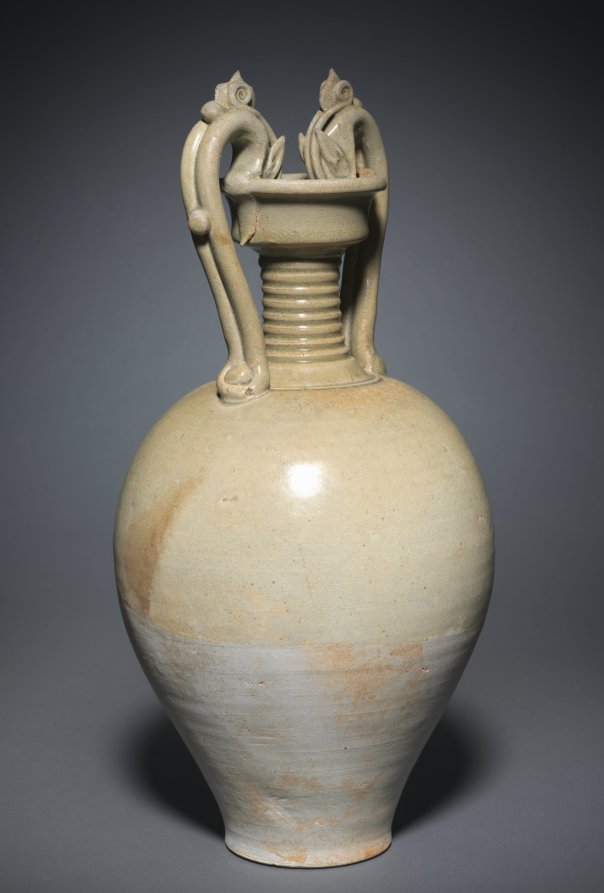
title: Jar (Amphora) with Dragon Handles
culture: China, Sui dynasty (581-618) to early Tang dynasty (618-907)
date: 600s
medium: glazed stoneware with modeled and applied decoration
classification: Ceramic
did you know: The two handles were formed by double coils of clay, which turn into dragon heads biting the vessel's rim.